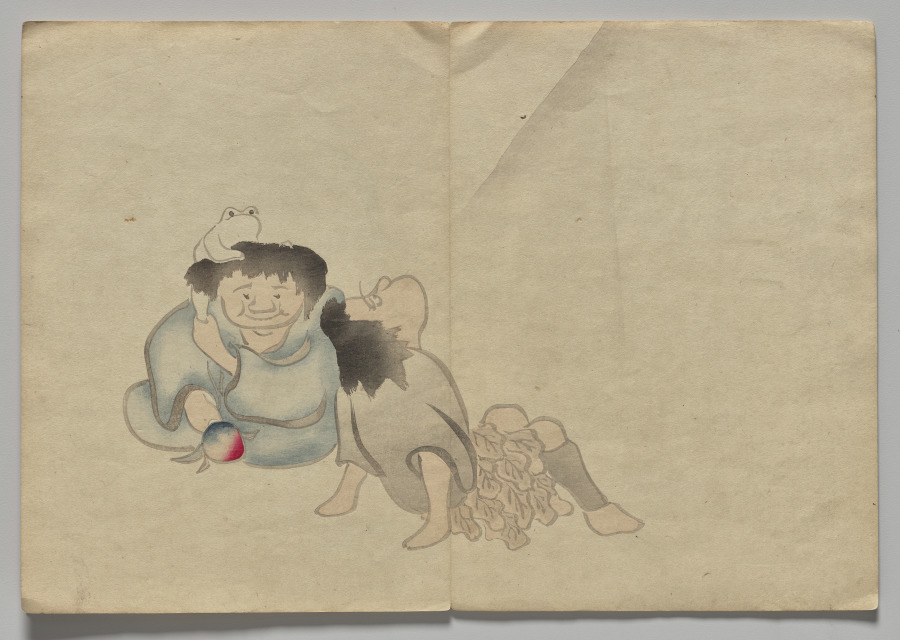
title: Scene from The Kōrin Picture Book (Volume 2)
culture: Japan, Edo period (1615–1868)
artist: Nakamura Hōchū (Japanese, d. 1819)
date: 1800s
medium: color woodblock printed book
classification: Bound Volume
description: Ogata Korin (1658-1716) was one of the most admired artists of Rimpa, or "decorative school painting." These books by the charming later-generation Rimpa artist Hochu record Korin's inventive designs.